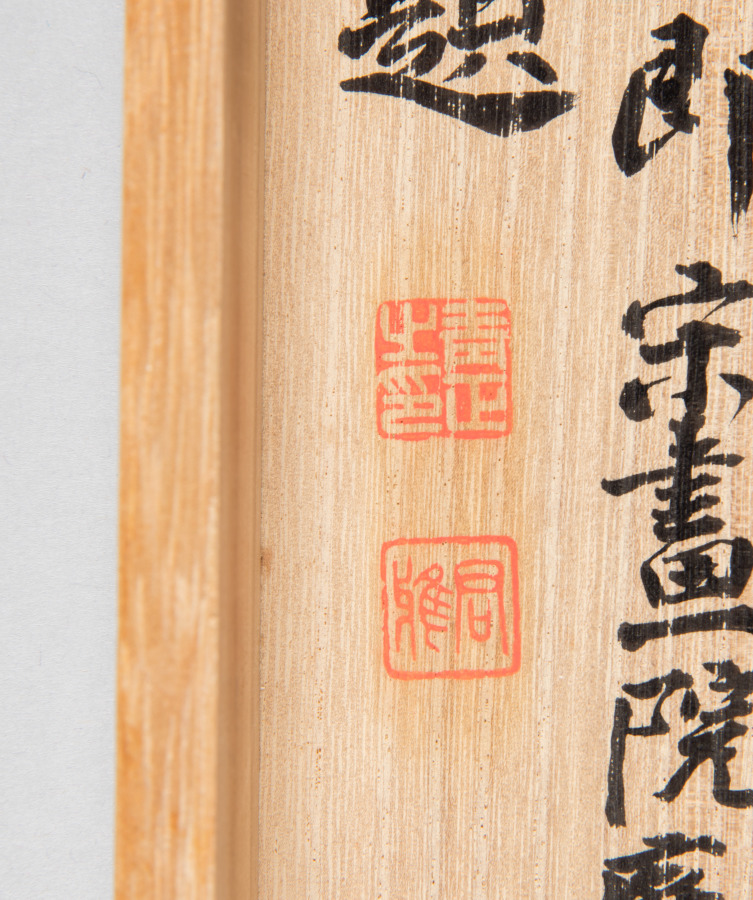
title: Mountain Market, Clear with Rising Mist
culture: Korea, Joseon dynasty (1392–1910)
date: early 1500s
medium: Hanging scroll; ink on silk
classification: Painting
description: This painting depicts several vignettes of the scholar-hermit’s various activities. In the lower left corner, the scholar-hermit is portrayed welcoming his guest in the courtyard. In the middle section on the lower bottom, the scholar and his guest are shown encountering another traveler on the bridge and exchanging their greetings. After crossing the bridge, the scholar visits a friend who lives in a compound of multiple buildings. The two friends decide to take a short walk. Both appear in a terraced cliff, enjoying a mountain vista and the fragrance of an old pine tree carried by the gentle wind. The scholar continues his journey with his two servants. They are portrayed crossing a winding wooden bridge. Right beyond the colossal rocky mountain, a panoramic view to a bustling market place unfolds, suggesting that it may be the place where the scholar-hermit’s entourage would visit. Perhaps the scholar need to buy items such as books, rolls of papers, and brushes, all essential to scholarly life. Toward the upper left corner, another group of travelers is landing on the river bank that leads to the city gate; they may be headed to the multistoried Buddhist stupa nestled on the top of the mountains.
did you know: Due to its stylistic features, this painting has long been believed to be a Chinese painting of the Northern Song period, dated to the 12th century.